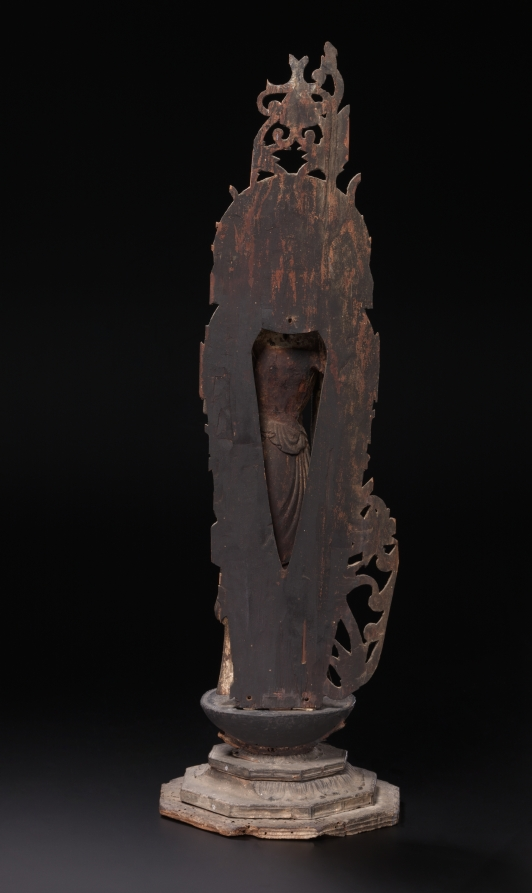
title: Miroku: Future Buddha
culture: Japan, Heian period (794–1185)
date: 1100s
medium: wood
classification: Sculpture